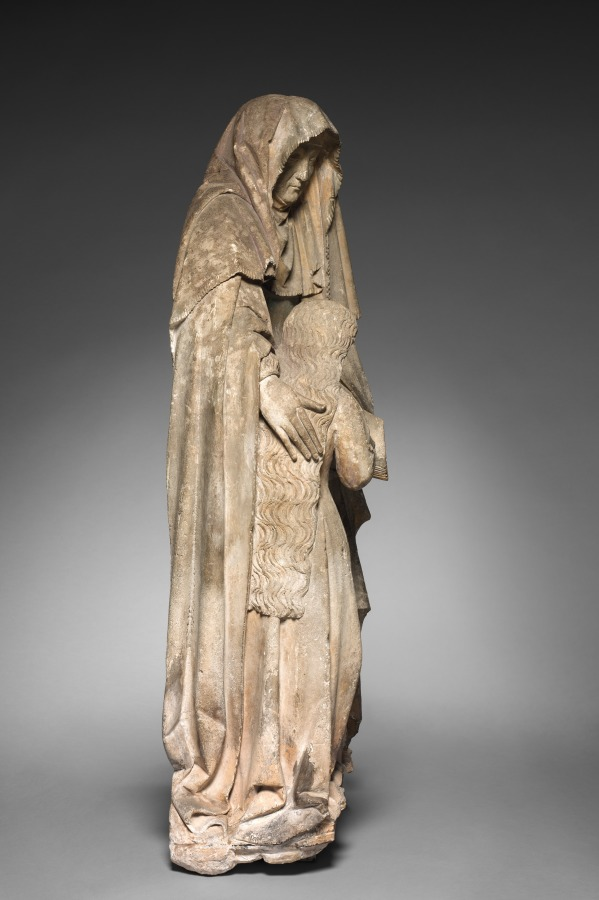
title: Education of the Virgin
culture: France, Bourbonnais, 16th century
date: c. 1500–1510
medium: limestone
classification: Sculpture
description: This relief depicts the young Virgin Mary learning to read at the knee of her mother Anne.